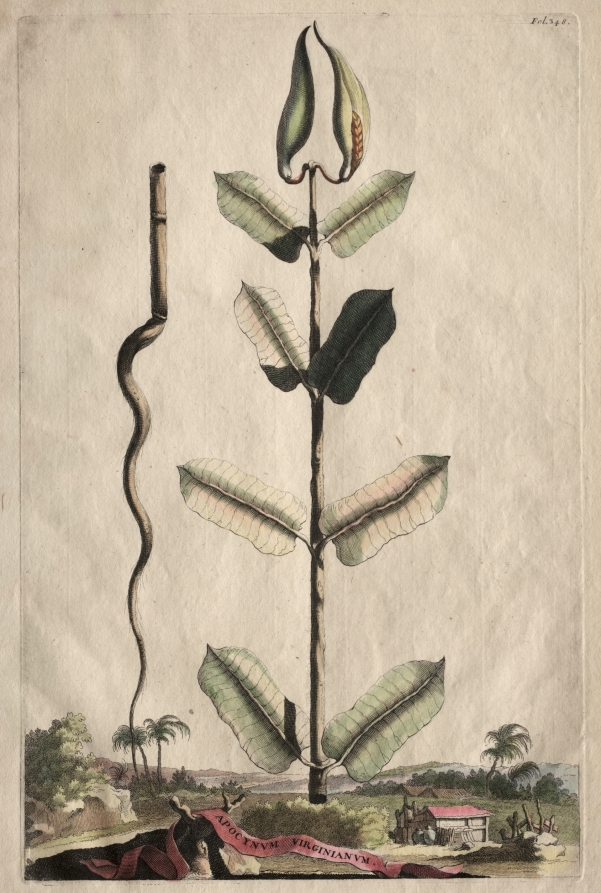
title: Phytographia Curiosa: Apocynum Virginianum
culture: Netherlands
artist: Abraham Munting (Dutch, 1626–1683)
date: c. 1651–83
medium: etching, hand colored with watercolor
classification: Print